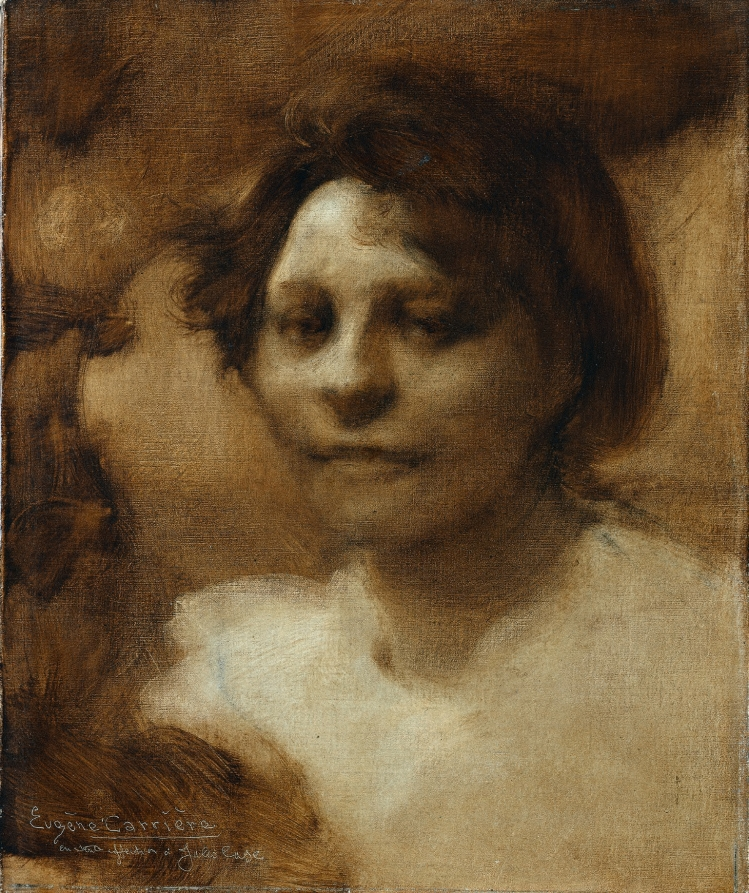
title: Madame Case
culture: France, late 19th-early 20th Century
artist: Eugène Carrière (French, 1849–1906)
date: after September 1900, probably summer 1901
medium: oil on fabric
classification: Painting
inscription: Signed sgraffito into paint at bottom left: Eugène Carrière en toute affection à Jules Case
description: This painting may depict the wife of the artist's close friend, writer Jules Case. In a letter written after her death, Case asked the artist to paint her portrait from an enlarged photograph. "My dear friend," Case wrote, "would you preserve the only face which, from now on, can bring me some little joy, if one can use this word for a sentiment mixed with so much suffering." Carrière emphasized the poetic mood by placing the shadowy figure in a vague, dreamlike space. Known for his evocative paintings of women and children, Eugène Carrière was loosely associated with the French Symbolist movement, which aimed at expressing inner, spiritual life and emotions rather than the outward appearance of physical reality.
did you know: The painting evokes an illusory, dreamy quality that may reflect the fact that Carrière never met his model.